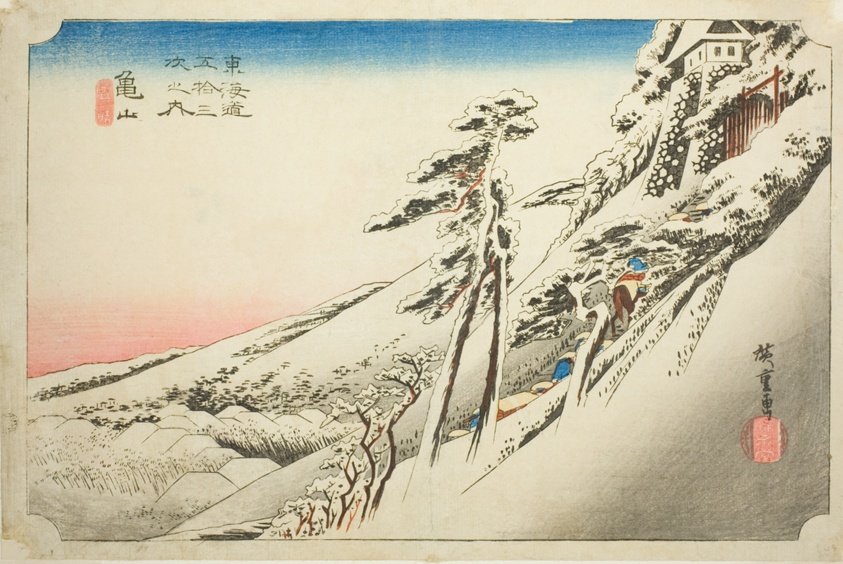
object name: Print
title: Kameyama: Weather Clearing after Snow (Kameyama, yukibare), from the series "Fifty-three Stations of the Tokaido (Tokaido gojusan tsugi no uchi)," also known as the Hoeido Tokaido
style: Japanese (culture or style)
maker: Utagawa Hiroshige 歌川 広重; Japanese, 1797–1858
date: c. 1833/34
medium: Color woodblock print; oban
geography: Japan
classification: woodblock print; print; asian art